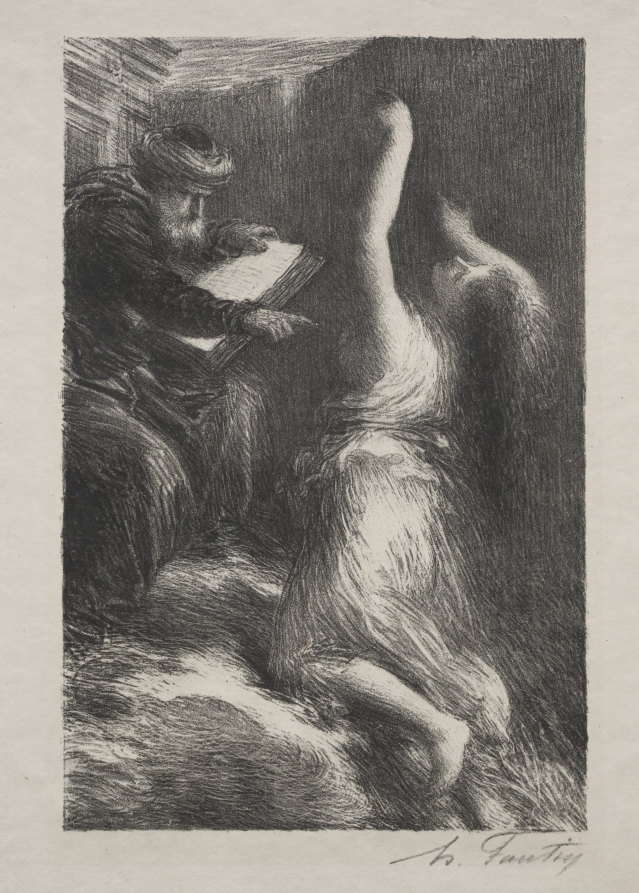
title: Parsifal, Act II: Evocation of Kundry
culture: France, 19th century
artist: Henri Fantin-Latour (French, 1836–1904)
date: c. 1886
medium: lithograph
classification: Print